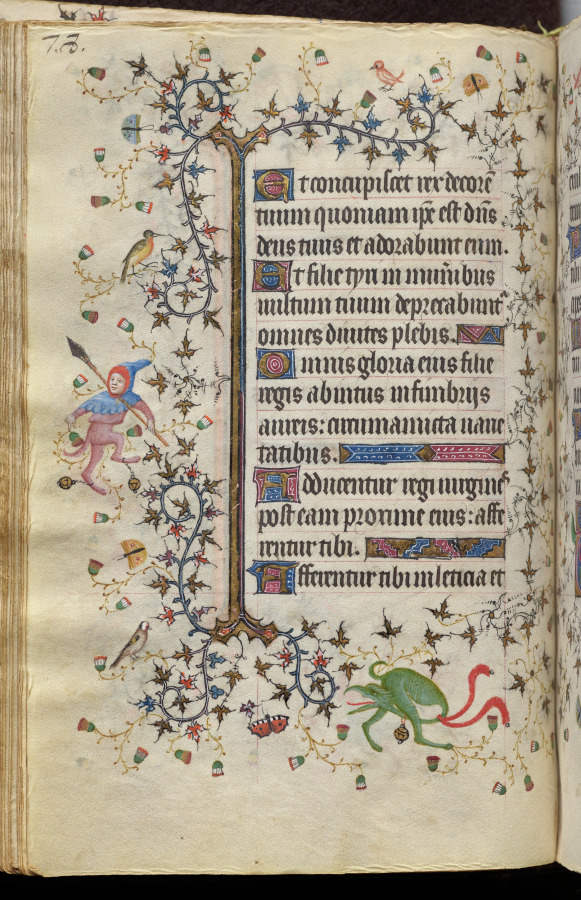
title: Hours of Charles the Noble, King of Navarre (1361-1425): fol. 39v, Text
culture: France, Paris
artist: Master of the Brussels Initials and Associates (French)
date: c. 1405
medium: ink, tempera, and gold on vellum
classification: Bound Volume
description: This precious book was highly prized by its owner, Charles III, King of Navarre, a French-born prince whose coat of arms is painted on 20 folios. Charles visited Paris on numerous occasions and likely acquired this volume there in 1404. Paris was the center of the European book trade at the time and attracted illuminators from many parts of Europe. This manuscript represents one of the most remarkable fusions of French and Italian taste in book illumination. Though conforming to Parisian standards, most of the book’s major miniatures are the work of the Brussels Initials Master, an Italian illuminator who previously worked in Bologna and Padua.